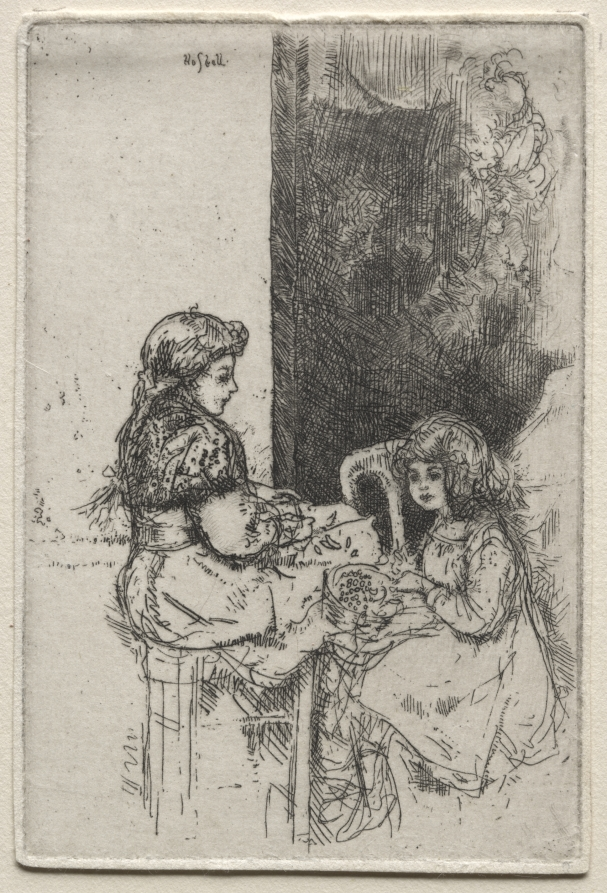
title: Paris: Shelling Peas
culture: America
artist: Ernest Haskell (American, 1876–1925)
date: 1910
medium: etching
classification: Print